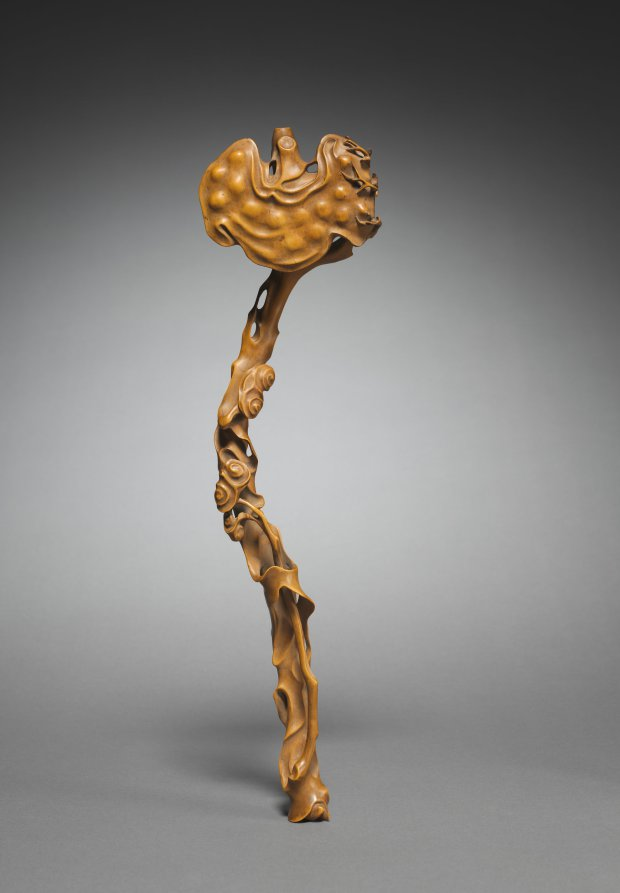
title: Scepter in the Shape of a Ruyi Fungus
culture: China, Qing dynasty (1644-1911)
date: 1700s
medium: carved boxwood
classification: Wood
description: The ruyi scepter was among the decorative items collected by the Chinese literati. It was thought that lofty and refined men of ancient times—the Seven Sages of the Bamboo Grove of the late 200s CE—carried ruyi scepters during the so-called pure conversations of the Daoists. The name ruyi (literally, as one wishes) conveys blessings of wish fulfillment. The fungus-shaped head is an emblem of immortality.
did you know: Boxwood is a small, slow-growing evergreen tree found in Southeast China and as far as Europe.